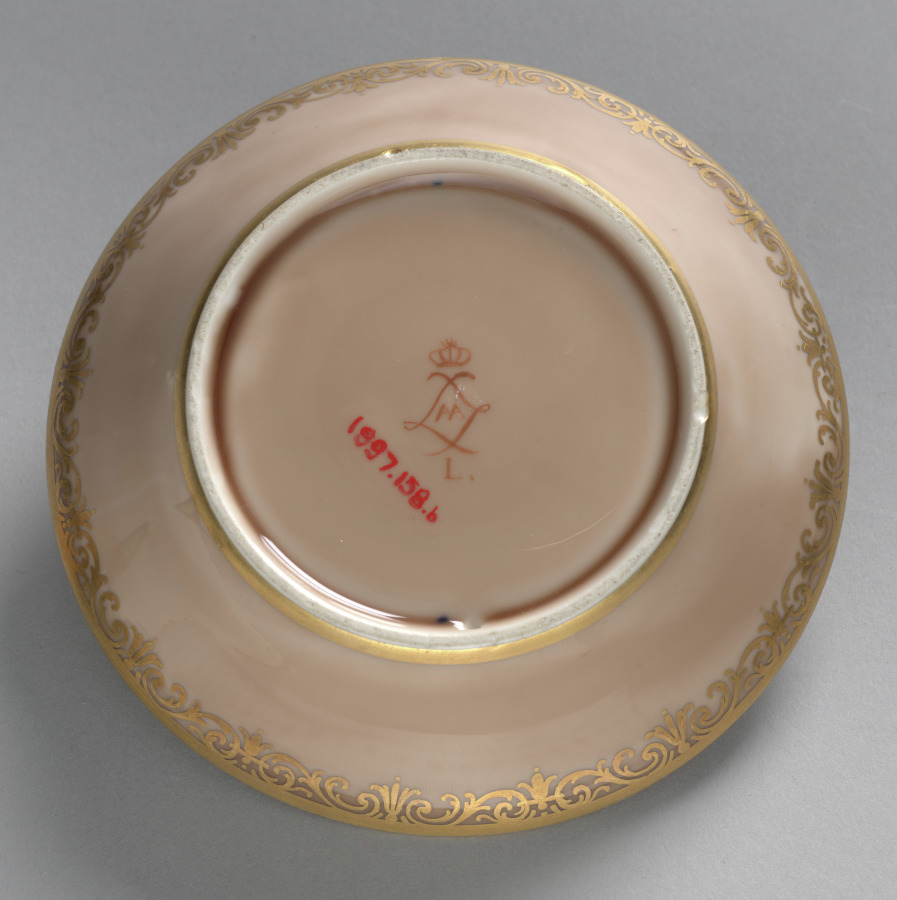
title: Saucer (Soucoupe)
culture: France, Sèvres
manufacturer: Sèvres Porcelain Factory (French, est. 1756)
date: 1778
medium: hard-paste porcelain with overglaze enamel decoration and gilt and silver decoration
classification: Ceramic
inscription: Interlaced Ls surmounted by a crown with date letters 'AA' enclosed; 'L.' below (in red); two underglaze dots (in blue)